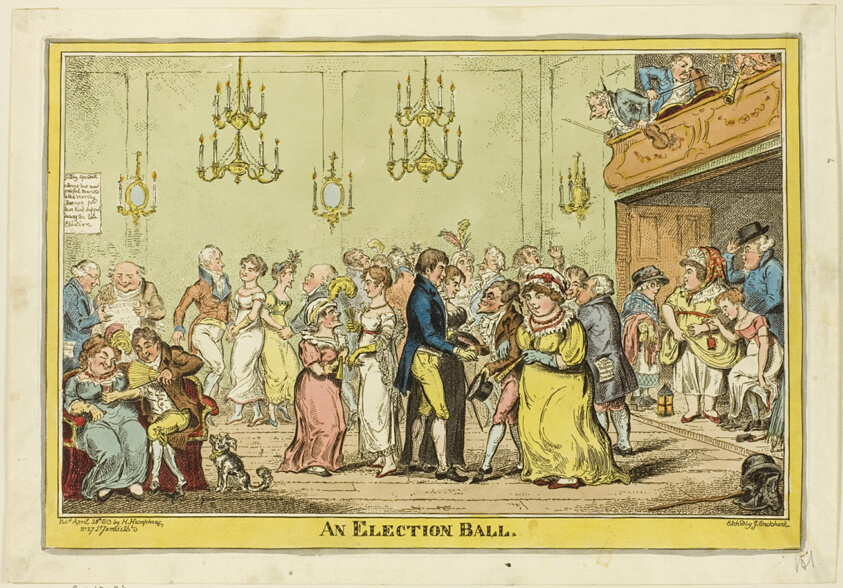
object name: Print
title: An Election Ball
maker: George Cruikshank (English, 1792-1878); published by Hannah Humphrey (English, c. 1745-1818)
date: published April 28, 1813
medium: Hand-colored etching on paper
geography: England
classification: etching; print; prints and drawing